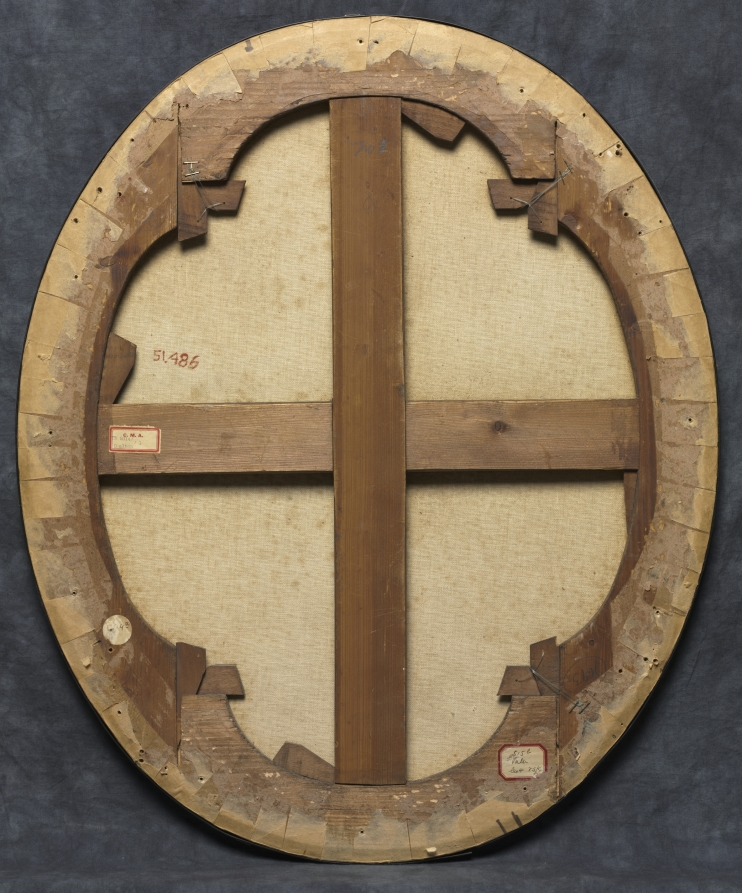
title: Spring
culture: France, 18th century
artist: Jean-Baptiste Pater (French, 1695–1736)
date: c. 1720–36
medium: oil on canvas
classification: Painting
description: Spring and Summer are two scenes from a four-season series. These landscapes were originally a part of a screen or a decorative panel, indicated by their floral borders and oval shape. The setting of Spring is believed to be the grounds of Montmorency, the country estate of Pierre Crozat (1665–1740), a wealthy financier and art collector in early eighteenth-century Paris. Summer counters Spring's aristocratic leisure by depicting rural labor. Befitting the work's decorative origins, however, Pater's scene belongs to the tradition of the timeless pastoral. More idyllic than a statement about class differences, the reapers peacefully gather sheaves of wheat as shepherds rest with their flocks in the foreground.